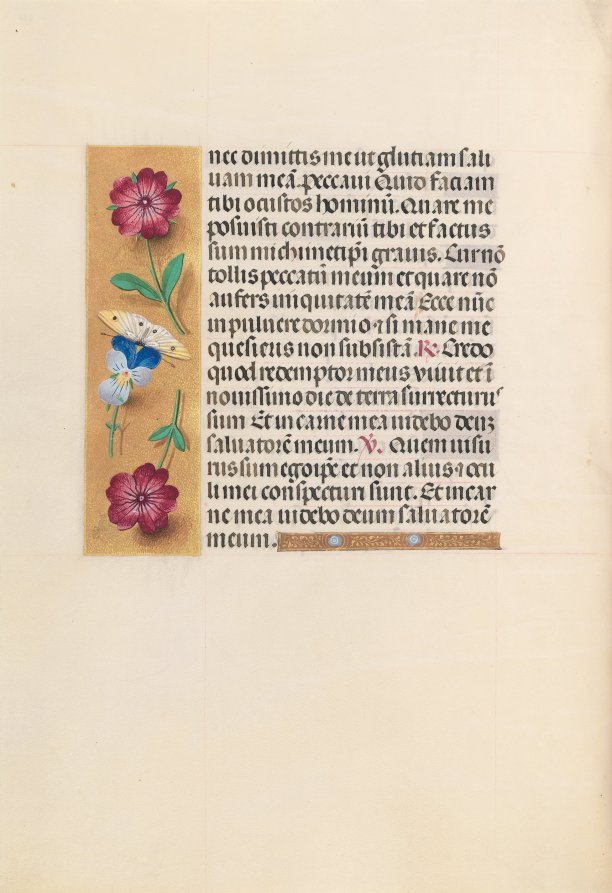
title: Hours of Queen Isabella the Catholic, Queen of Spain: Fol. 231v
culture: Flanders, Ghent and Bruges, late 15th century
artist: Master of the First Prayerbook of Maximillian (Flemish, c. 1444–1519)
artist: and Associates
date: c. 1500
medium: ink, tempera, and gold on vellum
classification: Bound Volume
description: This manuscript was illuminated by a circle of at least five highly organized manuscript painters active in the Flemish cities of Ghent and Bruges. The principal illuminator was Alexander Bening, who painted the majority of the book's miniatures. Manuscripts produced by this circle of artists are renowned for the decoration of their borders, which typically feature a rich variety of realistically-painted flowers, birds, and butterflies. This prayer book, called a book of hours, was intended not for a cleric, but for the private devotions of a lay person-in this case, Isabella the Catholic, Queen of Spain (1451-1504). Isabella's coat of arms embellishes the book's frontispiece. It is unlikely that the book was commissioned by the Queen herself; rather, she probably received it as a diplomatic gift from someone courting her patronage, perhaps Cardinal Francisco Jimenez de Cisneros. A Franciscan friar, Jimenez was dependent upon Isabella for his advancement, first to the post of Queen's confessor in 1492, and then to Archbishop of Toledo in 1495.